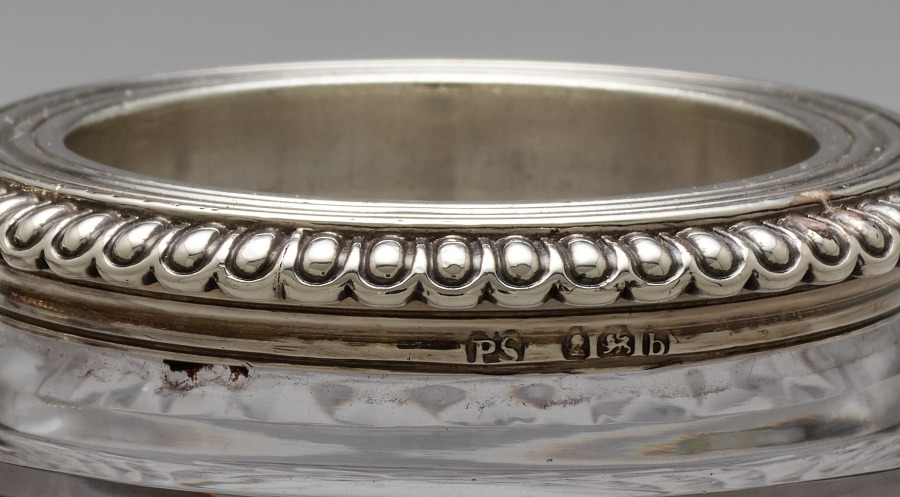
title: Pot (2 of 2)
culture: England, 19th century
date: 1817–18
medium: cut glass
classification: Glass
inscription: Stamped on rim: "PS", George III duty mark, Lion Passant, "b".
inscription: Scratched on base of vessel: "3136".